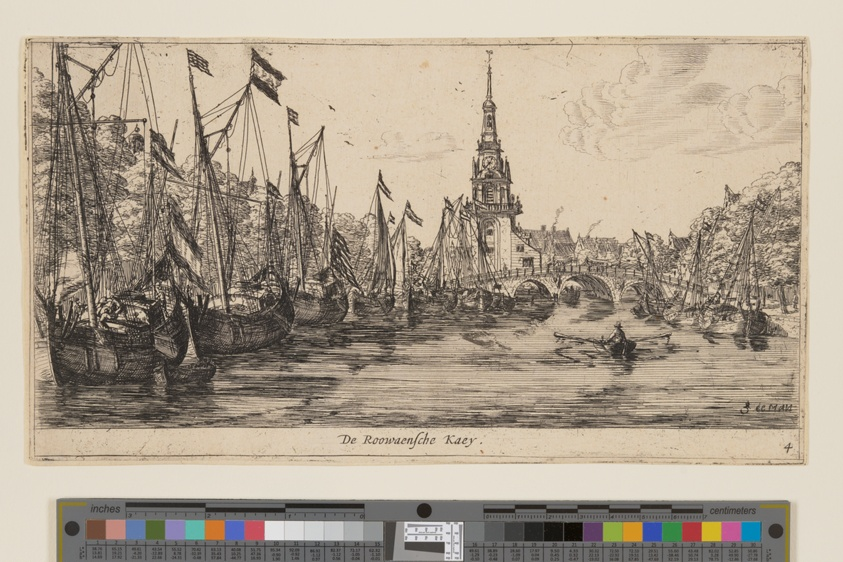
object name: Print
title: De Roowaensche Kaey, from Views of Amsterdam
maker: Reinier Nooms, called Zeeman (Dutch, c. 1623–1664)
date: c. 1660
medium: Etching on ivory laid paper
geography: Netherlands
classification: etching; paper; print; prints and drawing